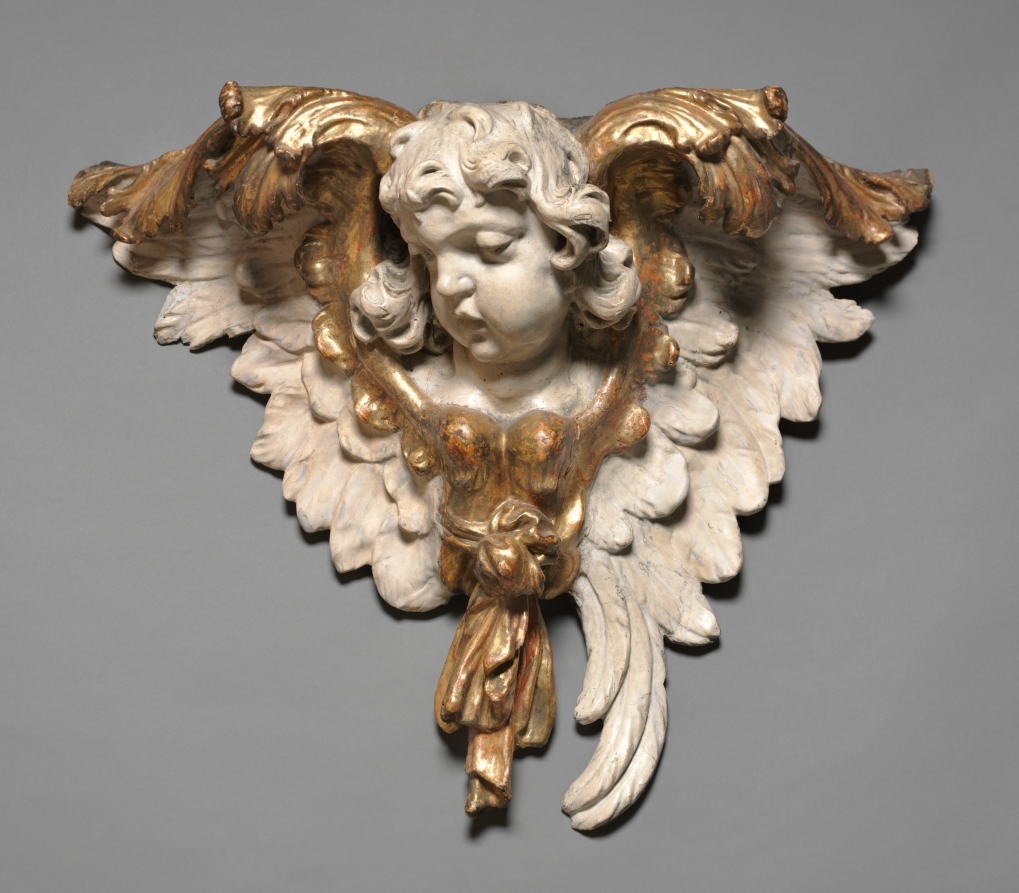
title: Head of an Angel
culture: Germany, 18th century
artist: Joseph Anton Feuchtmayer (German, 1696–1770)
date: c. 1750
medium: painted and gilded wood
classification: Sculpture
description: This decorative bracket was intended to simulate a functional supporting element at the top of a pilaster or beneath an organ loft or pulpit in a church. Joseph Anton Feuchtmayer, a member of a family of artists active in southern Germany and Switzerland, worked in a variety of media including wood and stucco. He often enlisted the aid of assistants, one of whom may have executed this work.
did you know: Part of the angel's wings are made more luxurious by the addition of gold paint, a process called "gilding."